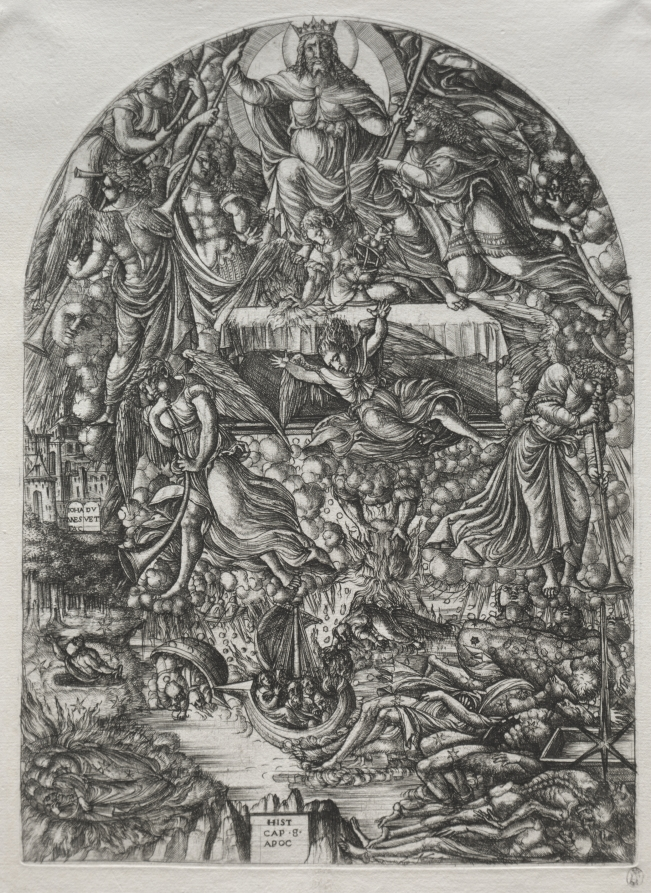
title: The Apocalypse: The Opening of the Seventh Seal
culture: France, 16th century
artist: Jean Duvet (French, 1485–1561)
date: 1561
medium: engraving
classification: Print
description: Jean Duvet was a goldsmith in Dijon, France, before taking up engraving. The relationship between the goldsmith’s art and that of the engraver is easily observed in this image of the opening of the seventh seal, a dramatic apocalyptic event at the end of the Book of Revelation from the New Testament. Figures crowd onto the image’s surface as they might appear on a metal plaque. Working outside the primary printmaking centers of Northern Europe and Italy, Duvet had little access to other printmakers and probably learned to engrave by studying prints by other masters. This is evident in his reliance on compositional elements derived from Albrecht Dürer’s woodcut series The Apocalypse.